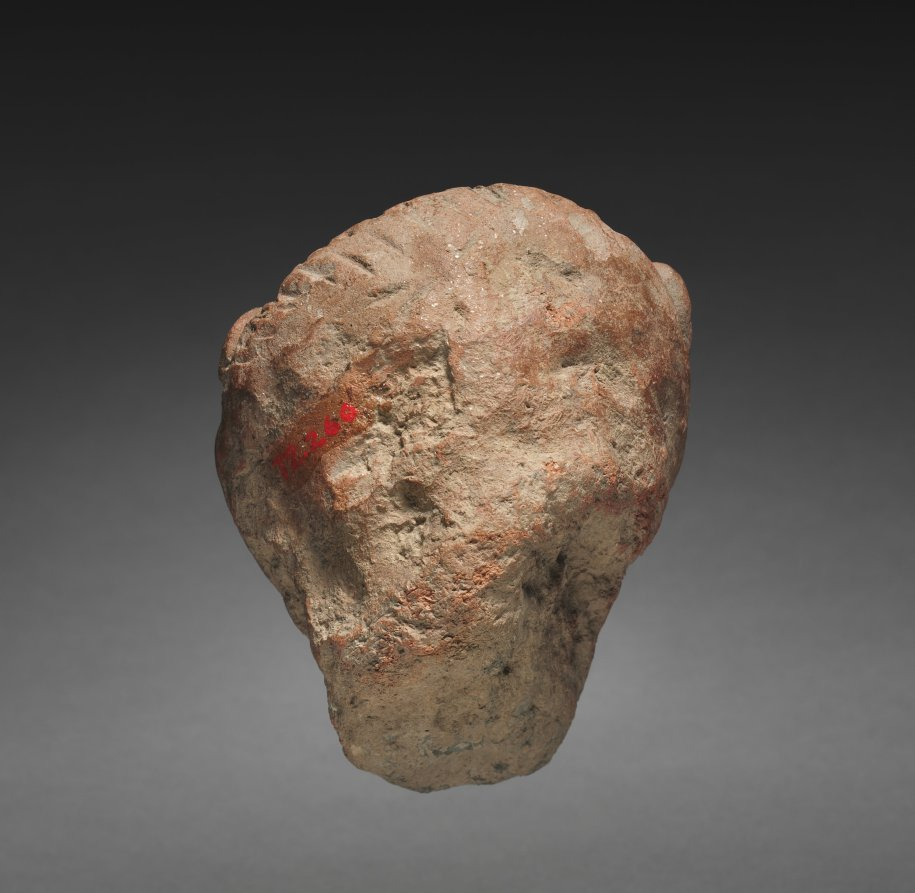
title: Grotesque Male Head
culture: India, Gupta period (320–647)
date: c. 400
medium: terracotta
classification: Sculpture